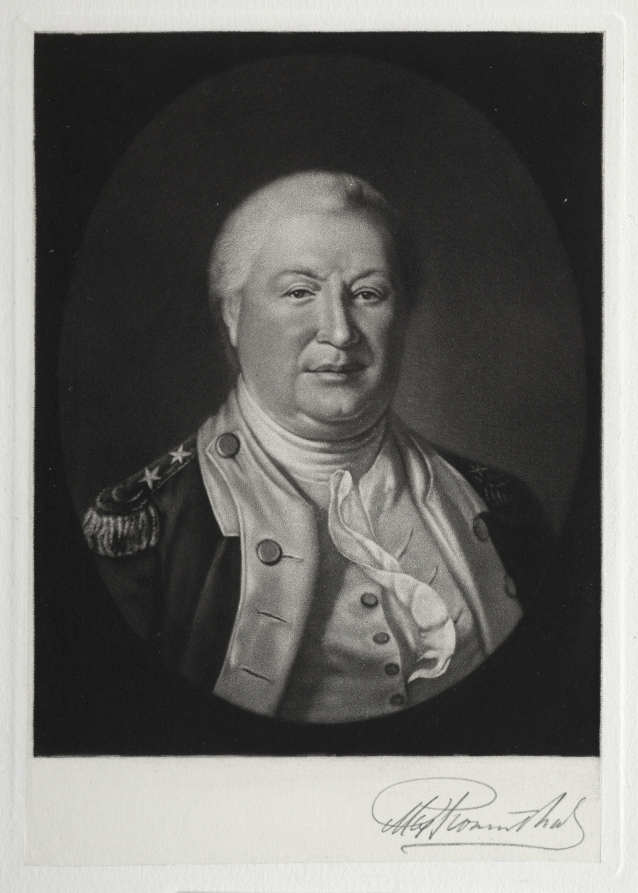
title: General Smallwood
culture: America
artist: Max Rosenthal (American, 1833–1918)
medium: mezzotint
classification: Print